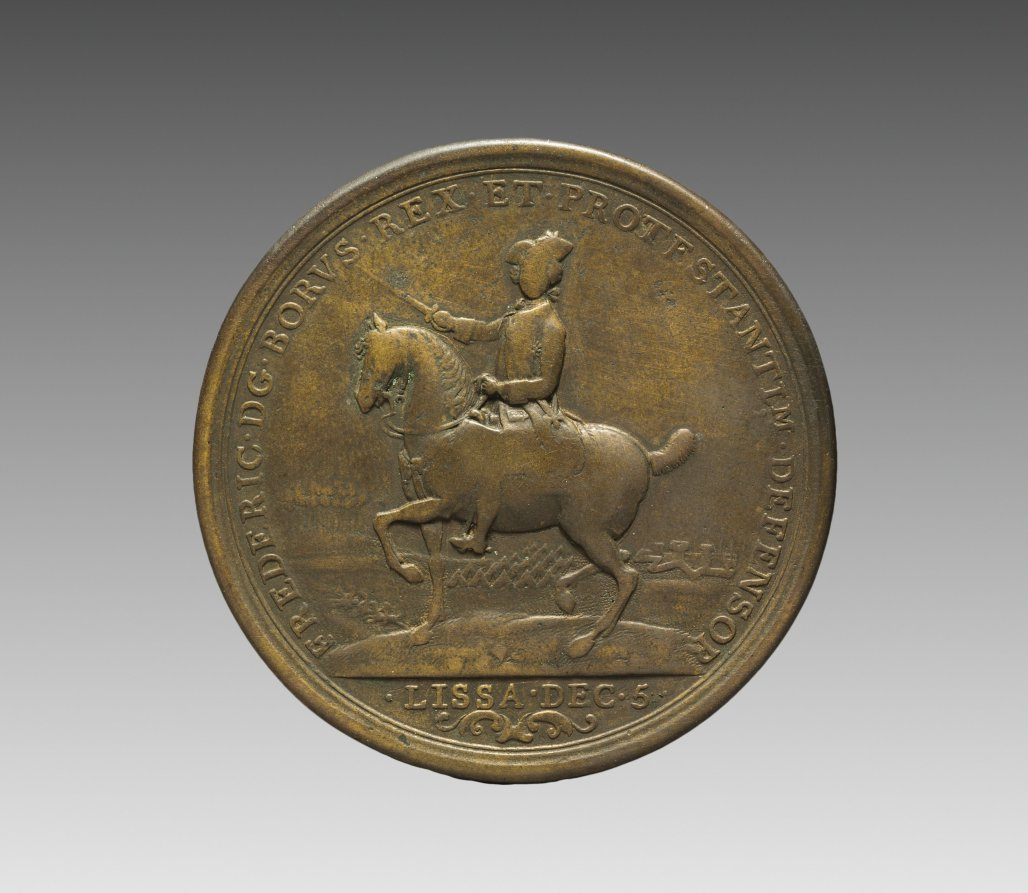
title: Portrait of Frederick the Great, King of Prussia (obverse)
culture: Germany, 18th century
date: 1757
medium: bronze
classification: Sculpture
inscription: "FREDERIC. DG. BORVS. REX, ET. PROTESTANTIM. DEFENSOR LISSA. DEC. 5."